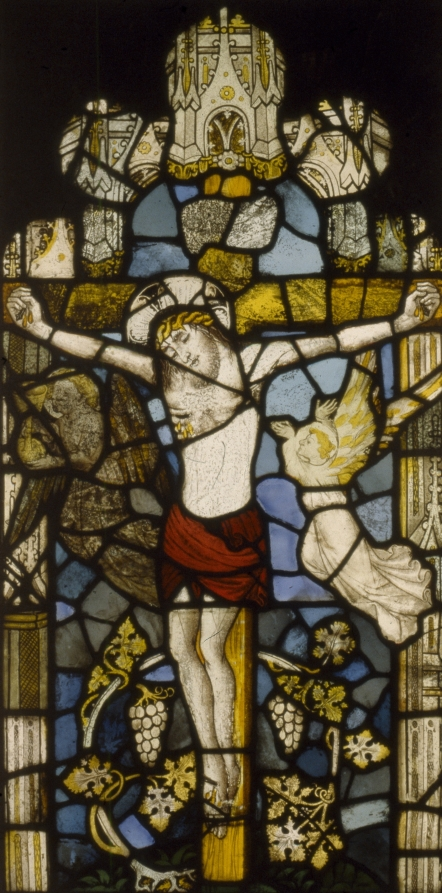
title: Crucified Christ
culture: England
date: c. 1480–1500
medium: pot metal, white glass with silver stain (with later composite glass)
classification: Glass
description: This panel would have originally been part of a much larger window. It represents the crucified Christ at the moment of death on the cross. Christ is flanked by two angels, one of which collects blood in a chalice from the wound in his right hand, a symbol of the Eucharistic wine. This potent symbol is reinforced by the scrolling vines with grapes. The window would have very likely been located behind an altar in a church where the symbolism would have resonated with the celebration of the Mass.